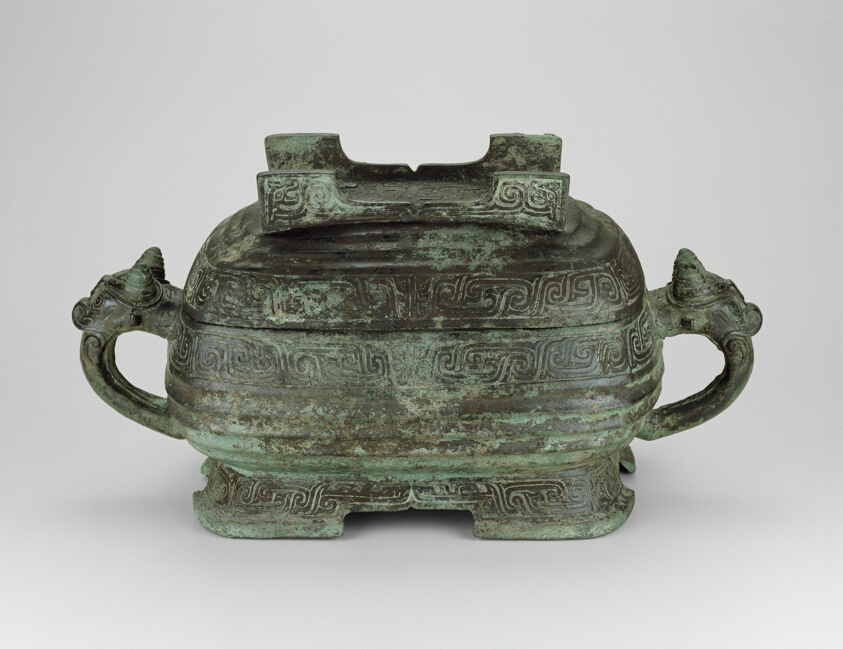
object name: Decorative Arts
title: Covered Food Container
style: Chinese (culture or style)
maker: China; Probably from Qishan, Shaanxi province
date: Western Zhou dynasty ( 1046–771 BC ), mid–9th century B.C.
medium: Bronze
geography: China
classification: vessel; bronze; metal; asian art; decorative arts